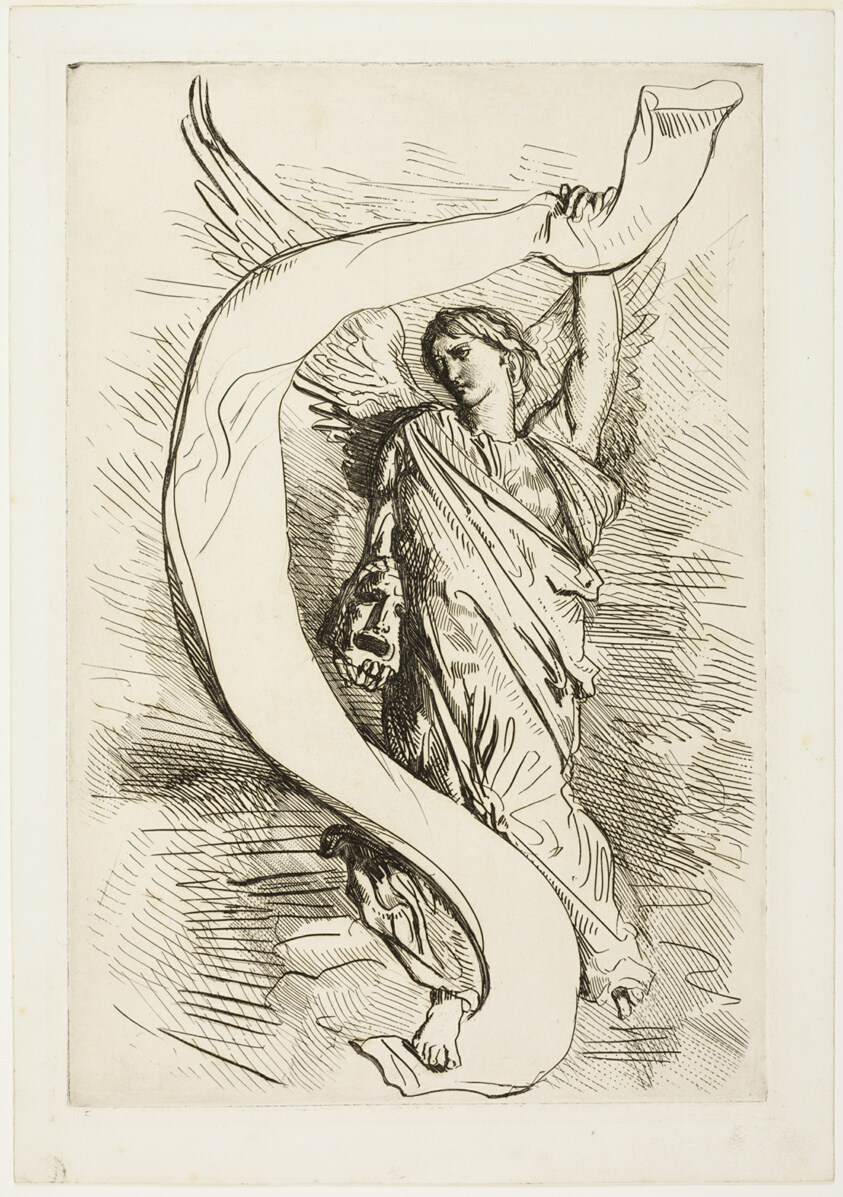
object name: Print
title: Frontispiece, from Othello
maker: Théodore Chassériau (French, 1819-1856)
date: 1844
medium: Etching, engraving and drypoint on white wove paper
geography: France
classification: etching; print; prints and drawing